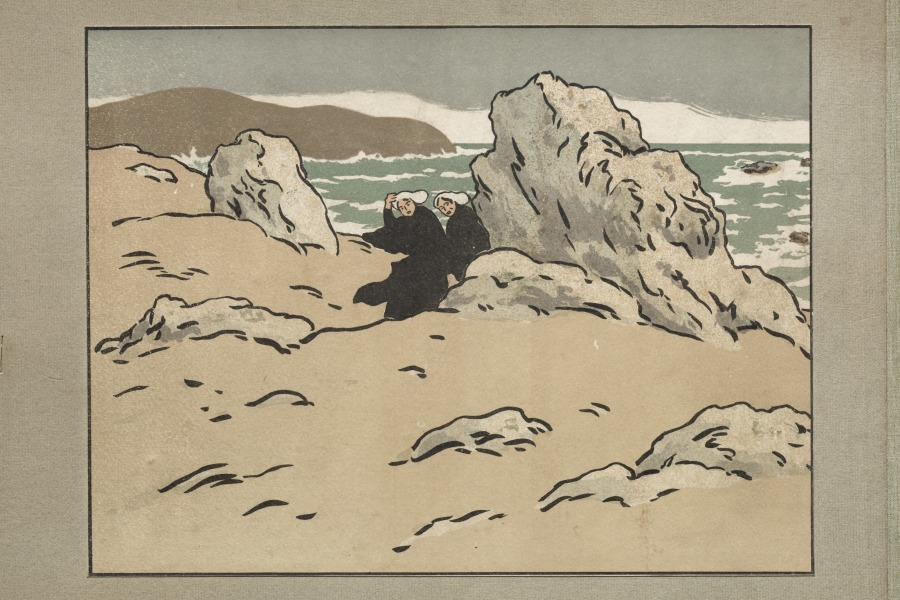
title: The Wandering Jew: Back Cover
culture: France, 19th century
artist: Henri Rivière (French, 1864–1951)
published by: Verneau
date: 1896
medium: color lithograph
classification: Portfolio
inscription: title page is signed, in blue crayon: Henri Rivière